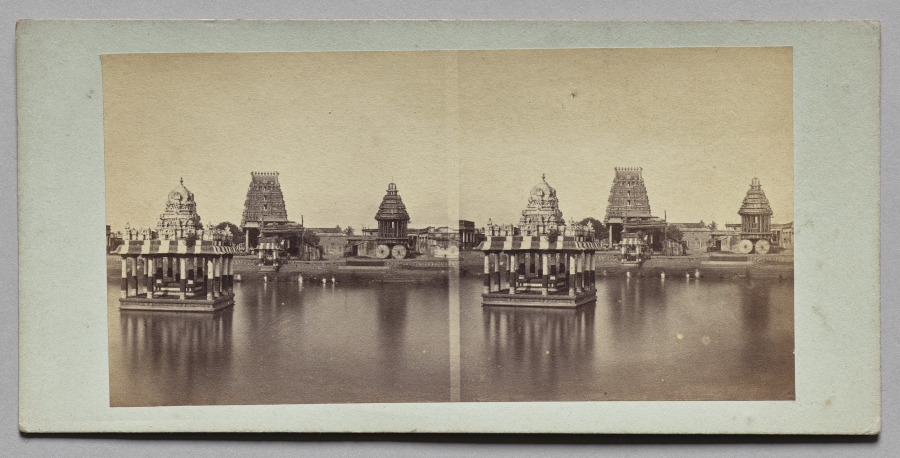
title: Temple Tank, Tamil Nadu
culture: Unknown British photographer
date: c. 1860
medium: stereoscopic albumen print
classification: Photograph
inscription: Written in pencil on verso: “A superb Indian stereocard £12/c. 1860/4775”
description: The photographer has not only shown us this Hindu temple from the southern Indian state of Tamil Nadu, but also one aspect of how people worshiped there: the ritual bath. He placed the temple’s tank in the foreground, with ghats (steps leading into the water), bathers, and a temple chariot for the procession of bronzes during festivals occupying the middle ground. In the background is a high gopura, a gateway that marks the entry into the temple’s grounds. When seen through a stereo viewer, the two images—each taken from a slightly different angle—create the illusion of a three-dimensional scene.